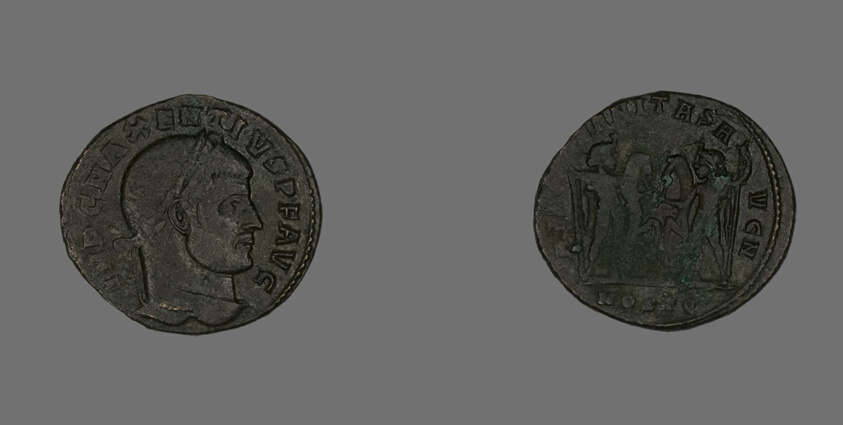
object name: Coin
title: Follis (Coin) Portraying Emperor Maxentius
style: roman (ancient, style or period), ancient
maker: Roman, minted in Ostia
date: 309-312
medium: Bronze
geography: Roman Empire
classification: coin; ancient art